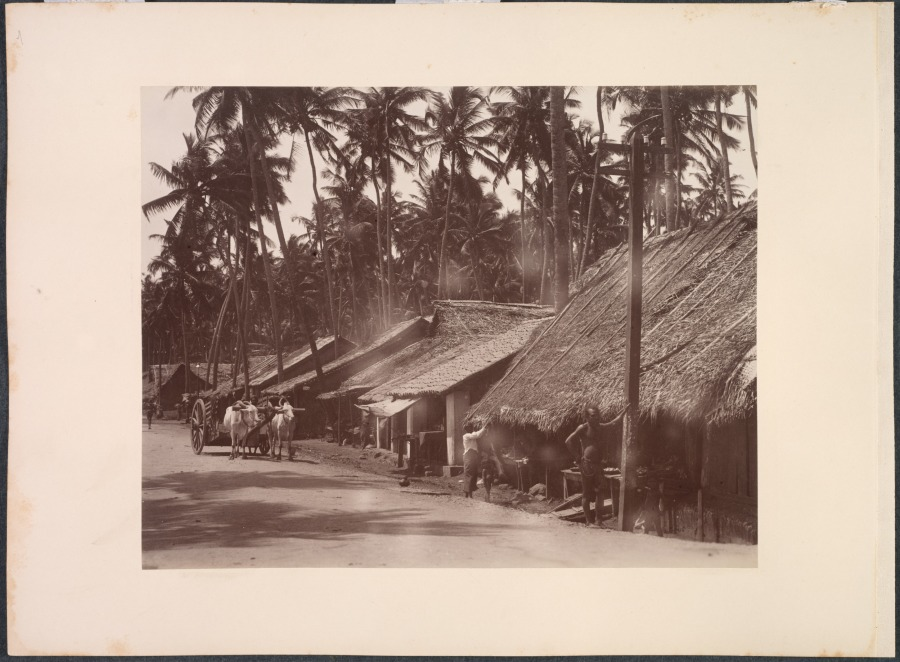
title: Untitled (recto); Untitled (verso)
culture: England, 19th century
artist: Skeen & Co. (British, active 1860–1920)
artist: Charles T. Scowen (British)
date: 1880s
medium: Albumen print, gold-toned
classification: Photograph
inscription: Written in pencil on mount with the image of the posed people: "6" Written in pencil on mount with image of oxen: "7" Written in pencil on verso of mat: "W.L.H. Skeen (1860-1900)/CEYLON, 1880s/gold-toned albumen print/1700 (Euros) 135 x 260 mm"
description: Probably taken by one of two British photographic firms based in Ceylon (present-day Sri Lanka), this image was likely shot by a European and was definitely made for a European audience, not for the individuals depicted. It is unlikely the sitters ever saw the finished photograph. Such ethnographic portraits were collected by governments as information, by tourists as souvenirs, and by “armchair travelers” as aids to the imagination. Viewers of the era would have regarded it more as a depiction of a cultural type than as a record of individual lives. Because interiors of temples were too dark to yield an image, the photographer arranged these Thai monks and worshippers along with some of their religious objects outdoors.